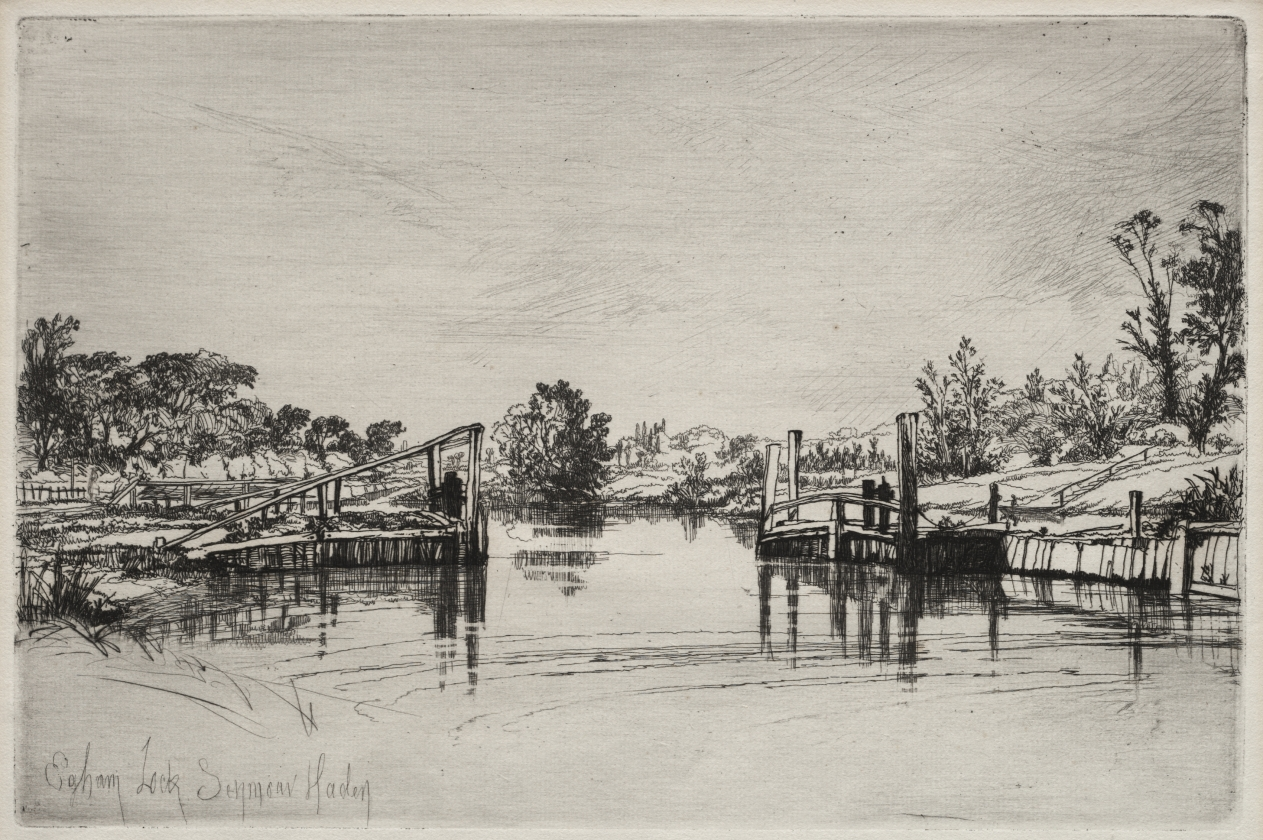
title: Egham Lock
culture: England, 19th century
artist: Francis Seymour Haden (British, 1818–1910)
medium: etching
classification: Print